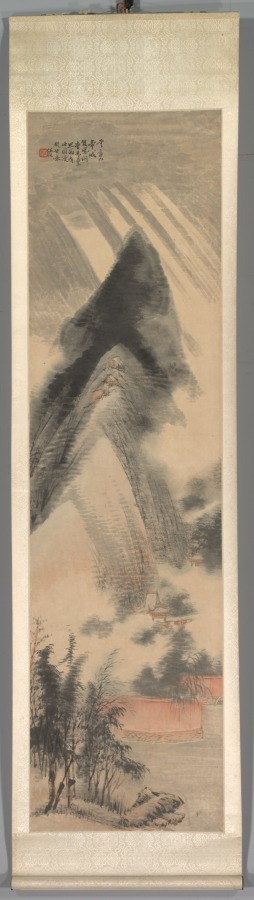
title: Landscape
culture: China, Qing dynasty (1644-1911)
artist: Ren Yu (Chinese, 1853–1901)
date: 1892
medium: Hanging scroll; color on paper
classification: Painting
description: This seasonal landscape is from a set of four hanging scrolls by Ren Yu. He was the youngest, most eccentric, and least prolific of the Four Rens, a family of prominent painters in Shanghai during the late Qing dynasty (1644–1911). Perhaps due to his opium habit and subsequent financial difficulties, Ren Yu tended to be lackadaisical in his work. The few remaining high-quality paintings hint at his artistic potential lost to opium. Though Ren’s premature death left his artistic promise unfulfilled, his paintings were acquired and donated to the museum by Charles Lang Freer (1854–1919), a wealthy businessman and art collector from Detroit. As Freer had hoped, this donation of Ren Yu paintings inspired the young Cleveland Museum of Art to continue to expand its own Chinese painting collection.